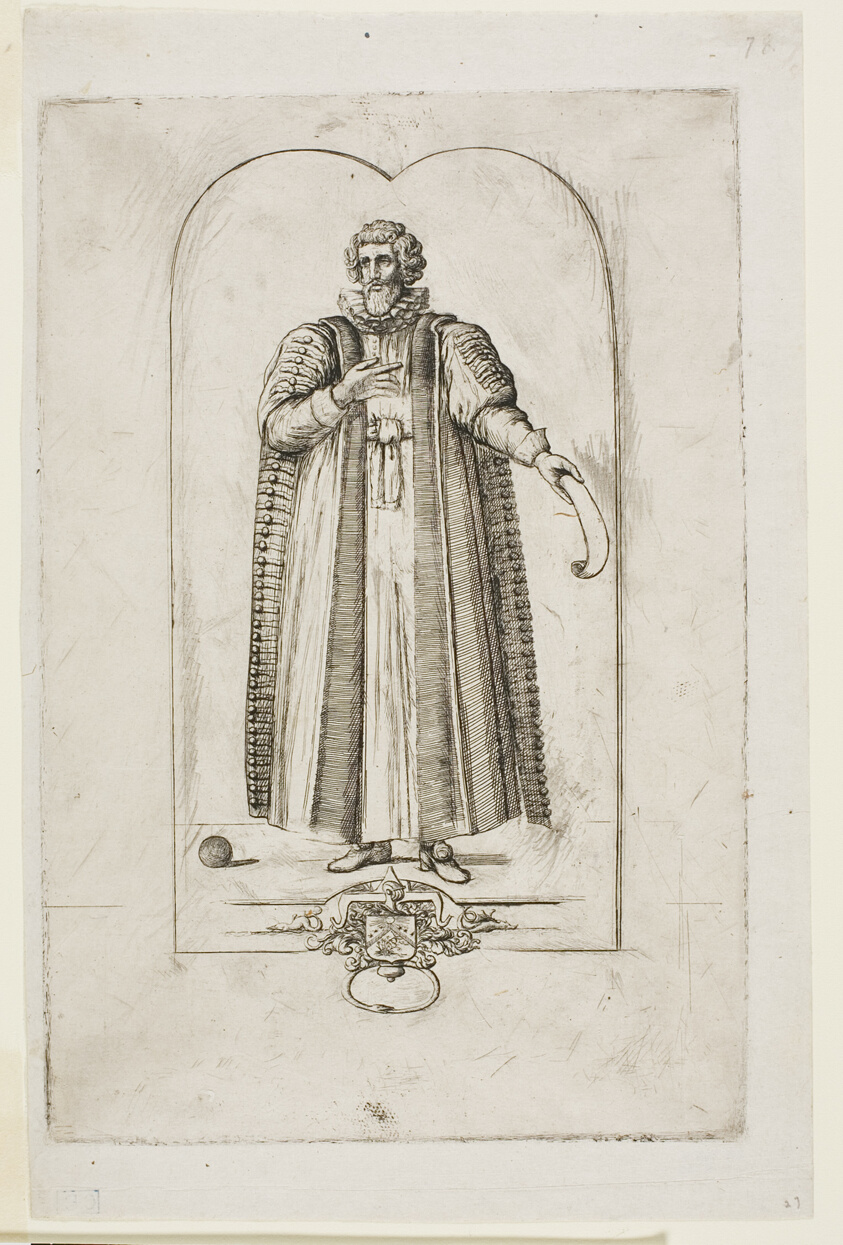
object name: Print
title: Portrait of François Viète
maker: Charles Meryon (French, 1821-1868); after Daniel Rabel (French, c.1578-1637)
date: 1861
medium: Etching with burnishing on grayish ivory laid chine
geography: France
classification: etching; print; prints and drawing